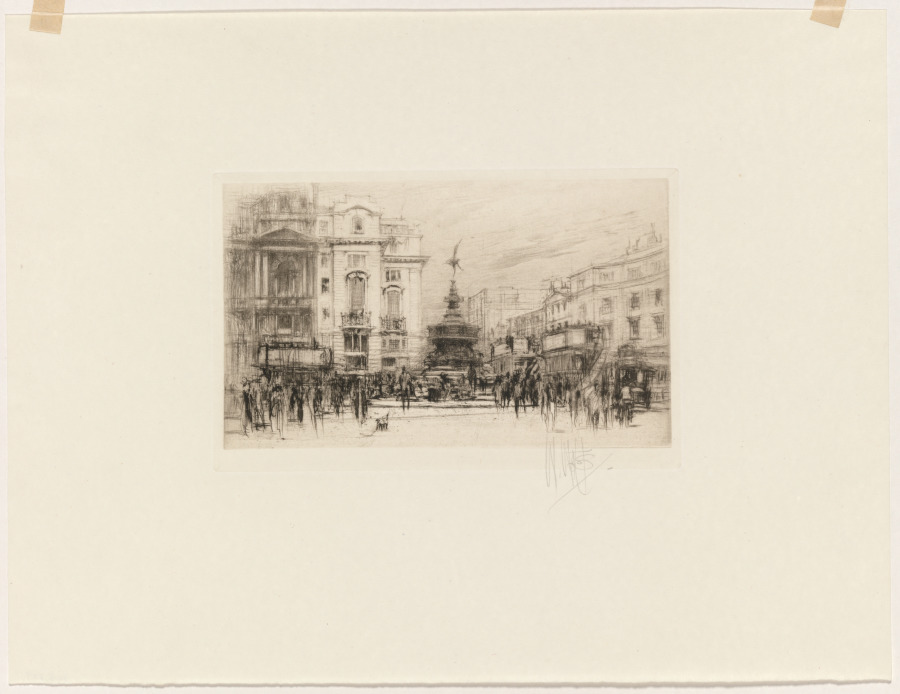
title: London Set: Piccadilly Circus (with Criterion Theatre)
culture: Britain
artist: William Walcot (British, 1874–1943)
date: 1924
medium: etching on wove paper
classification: Print